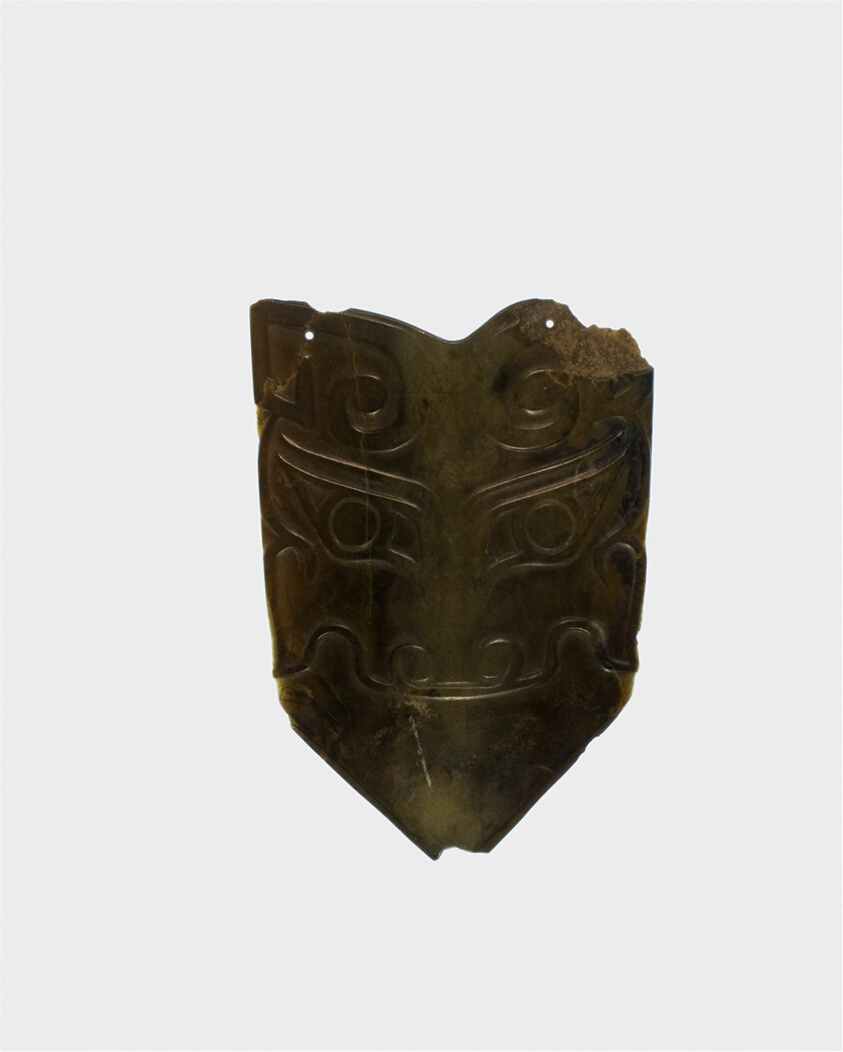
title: Applique, animal mask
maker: China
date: Shang dynasty (c.1600–1046 BCE)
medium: Jade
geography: China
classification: jade; asian art